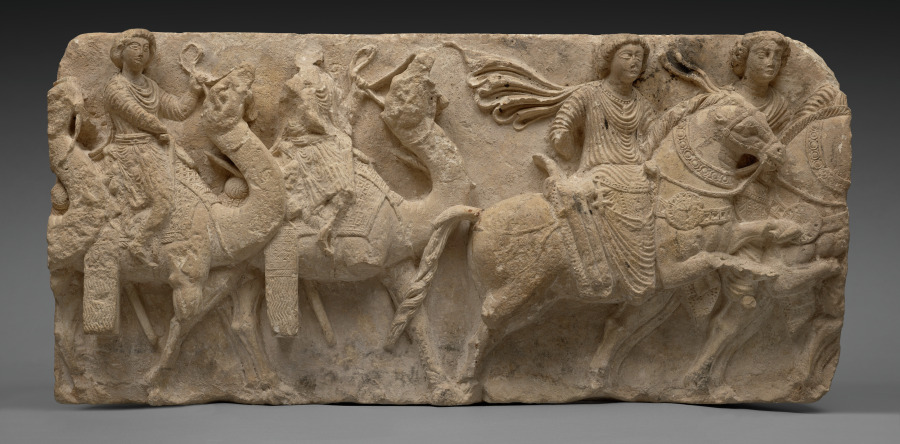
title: Procession of Nobles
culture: Syria, Palmyra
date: 100–150 CE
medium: limestone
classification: Sculpture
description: Palmyra was a key center for trade between the Roman and Parthian Empires. This unique relief has been associated with Palmyra only through stylistic comparisons; it is not known where it was found on the site. It depicts men in Parthian dress riding Arabian horses with bejeweled harness trappings ahead of riders on camels—a possible reference to the caravans that made Palmyra so wealthy. Although all of the riders are dressed and equipped as Parthians, the proportions and perspective of the scene seem to be informed by Greco-Roman conventions. It may depict a ceremonial procession.